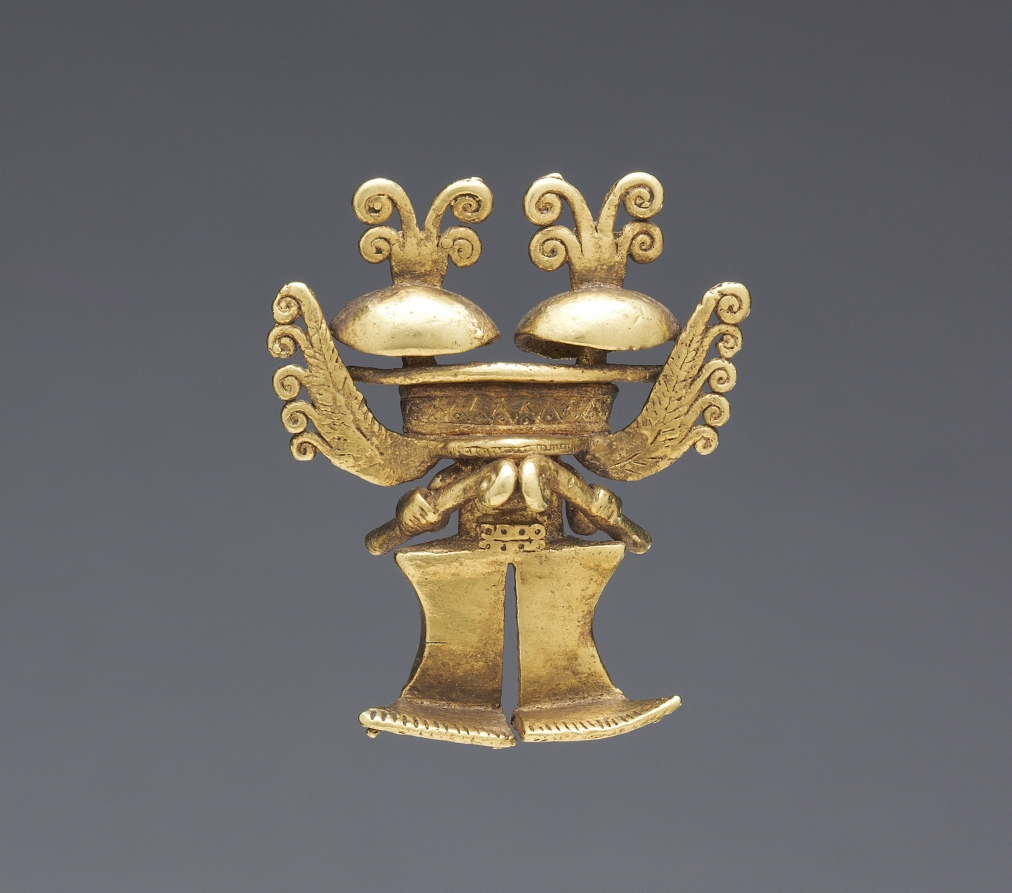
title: Animal-Headed Figure Pendant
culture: Colombia, Quimbaya or Yotoco style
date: 1–800 CE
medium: cast gold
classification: Metalwork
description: The same creature, nasty but precious, appears in both pendants (1939.515). Human in its posture and arms, its head is that of an animal with a long, toothy snout. It holds batons to its mouth, and whiskers or ears flare from the sides of the head. The little headdress domes are mystifying; they have been described as mushrooms, gourds, and ceramic vessels, among other things.